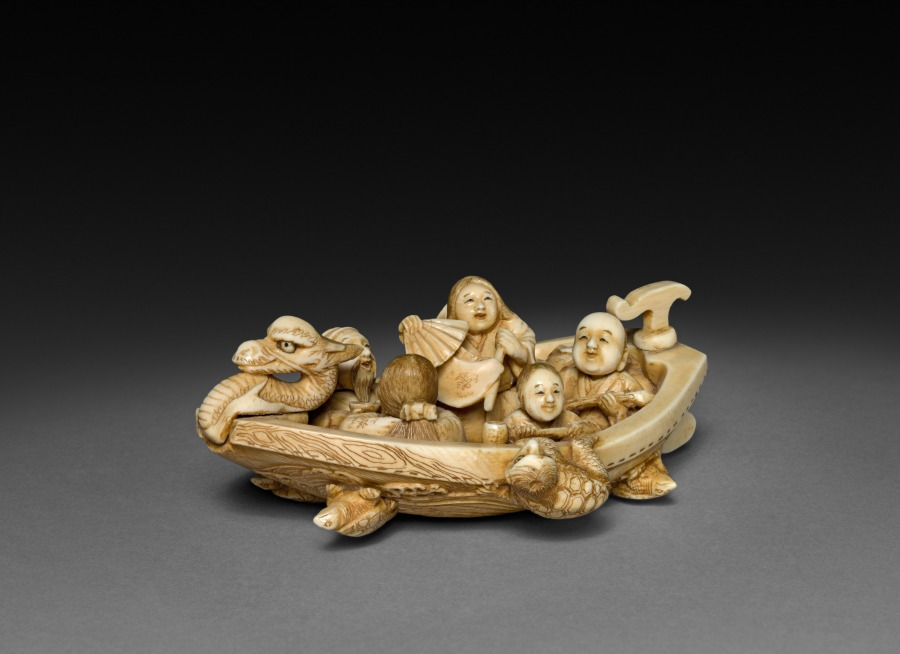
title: Boat with Six Passengers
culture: Japan, Edo period (1615–1868) to Meiji period (1868–1912)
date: c 1800s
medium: ivory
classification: Netsuke